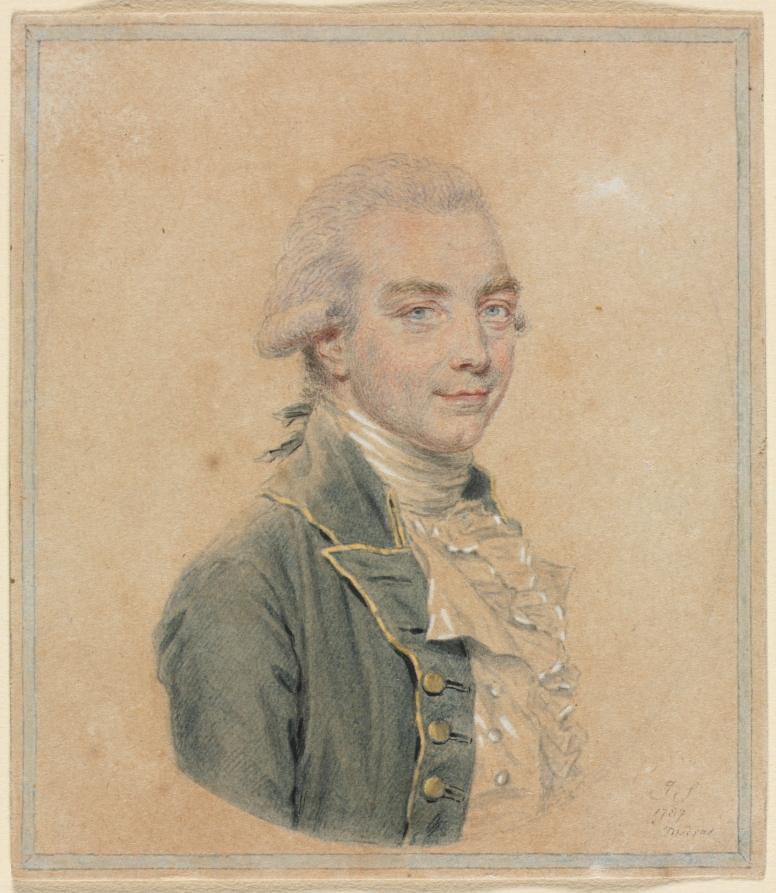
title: Portrait of Sir John Macpherson, 1st Baronet, Governor-General of India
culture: England, 18th century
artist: John I Smart (British, 1741–1811)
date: 1787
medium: watercolor and gouache heightened with white gouache on paper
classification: Portrait Miniature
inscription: signed, lower right, in black ink: J S / 1787 / Madras ; VERSO, lower right, in graphite: 6 1/8 x 6 7/8 Foskett, Daphne. John Smart: The Man and His Miniatures, pp. 13, 76, 89. London: Cory, Adams & Mackay, 1964.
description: The sitter’s head and shoulders face left. He smiles slightly and has light blue eyes, with his powdered hair curled above the ear and tied en queue. He wears a green jacket edged in gold with gold buttons and dons a high white collar, a waistcoat, and a frilled cravat, each highlighted with white gouache. The nature of this work as a finished drawing rather than exclusively a preparatory sketch for a miniature on ivory is evident in the degree of finish of the sitter’s clothing, which is painted to the oval termination within a border of pale blue gouache. A Colnaghi label was removed from the verso after the work entered the museum’s collection. Sir John Macpherson (1745–1821) was the son of a Scottish minister. His many tours of service with the East India Company were marred by corruption and scandal. He was made acting governor-general of India in 1785–86 between the resignation of Warren Hastings (1732–1818) and the succession by Lord Cornwallis (1738–1805). Macpherson was created a baronet in 1786 when he was removed from office, returning to England shortly thereafter. He was an inveterate bachelor, popular in society for his handsomeness, charm, and facility with languages, but also known for his avarice and fraudulence. The work is signed with Smart’s initials and dated “1787 Madras” at the lower right. Macpherson was no longer governor-general in 1787 and would have been preparing to return to England when this portrait was painted. The drawing is inscribed on the back in the artist’s hand: “a sketch of Sir John Macpherson painted at Madras, 1787, on his passage from Bengall [sic] to England by Jno [sic] Smart.” Smart did not return to England until 1795, so the word passage must be defined as “on his journey” rather than “aboard ship.” At the time this portrait was taken, Macpherson was grappling with his premature removal from office and beginning to plot what would become many years of negotiations to regain his position or receive compensation for having lost it, though none of this emotional turmoil is visible in Smart’s portrait.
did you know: John Smart retained hundreds of sketches which were passed down in turn to his son, granddaughter, and great-grandchildren.